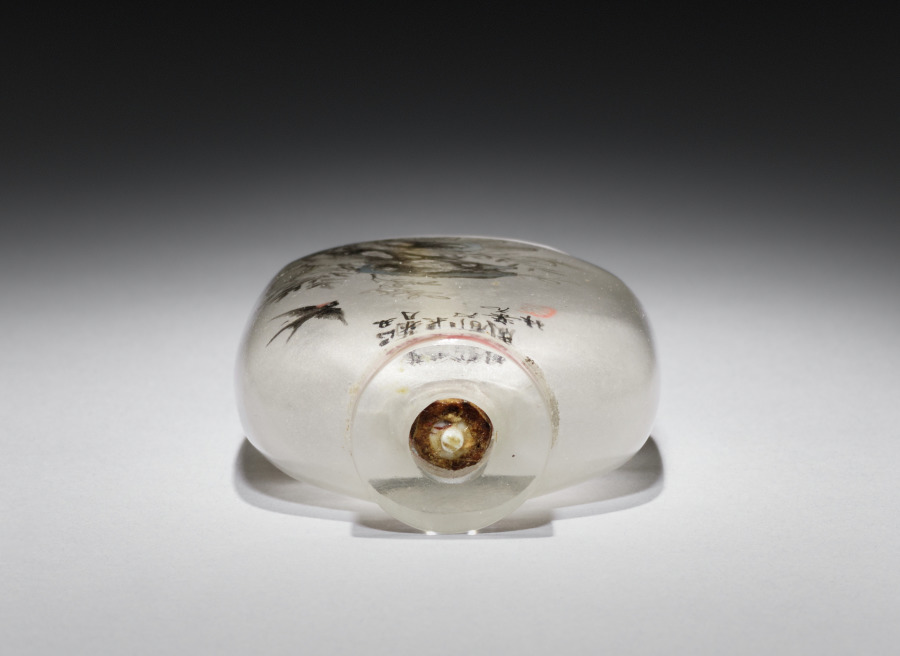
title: Snuff Bottle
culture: China, Qing dynasty (1644-1911)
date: 1644–1911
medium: glass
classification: Glass